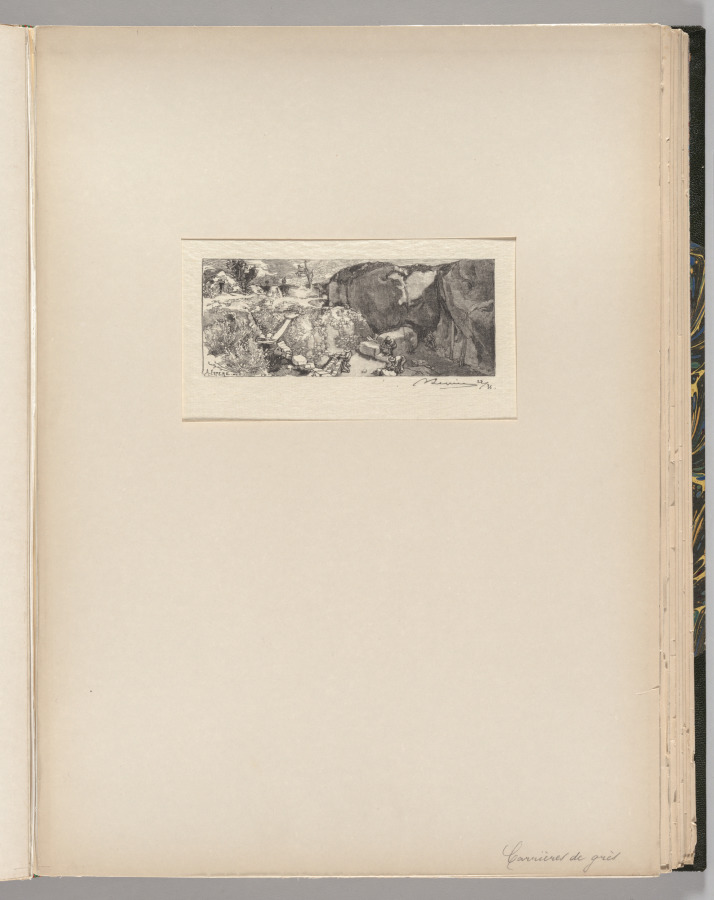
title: Fontainebleau Forest: Sandstone Quarry (La Forêt de Fontainebleau: La Carrièrre de Grès)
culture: France, 19th century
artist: Auguste Louis Lepère (French, 1849–1918)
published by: A. Desmoulins, Published in Revue Illustrée, 1887–90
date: 1890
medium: wood engraving from bound volume of 34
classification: Bound Volume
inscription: In block, lower left: A. LEPERE del.; below image, lower right, in black ink: ALepère 22/35; on window mat, lower right, in graphite: Carrièrre de grès